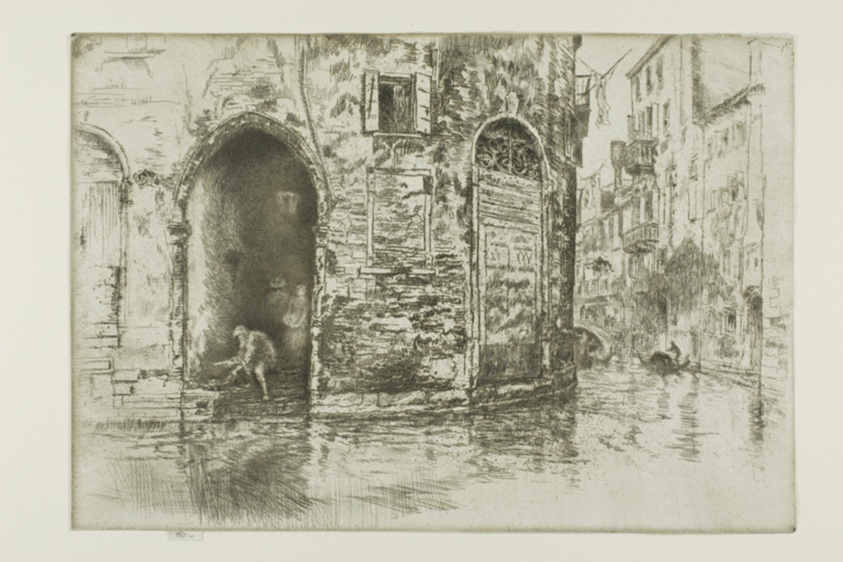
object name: Print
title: The Two Doorways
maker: James McNeill Whistler (American, 1834-1903)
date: 1879/80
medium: Etching and drypoint with foul biting in dark brown ink on off-white laid paper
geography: United States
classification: etching; print; prints and drawing; drypoint; foul biting; paper